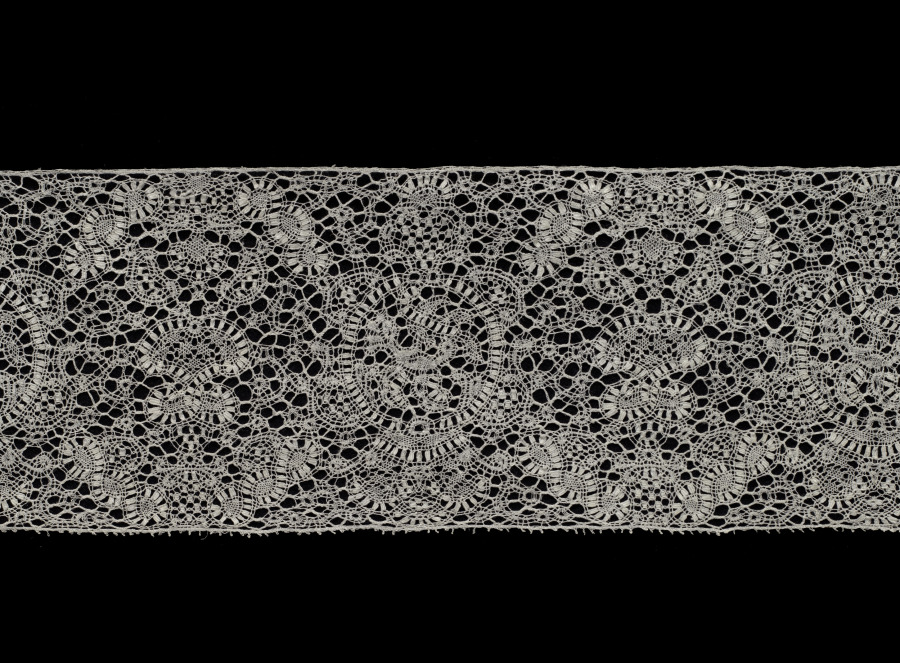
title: Lace Edging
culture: Belgium, Binche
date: 1700s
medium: Linen: bobbin lace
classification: Lace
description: The design of this piece of lace is similar to three other pieces of lace in the CMA's collection—1945.87–89.